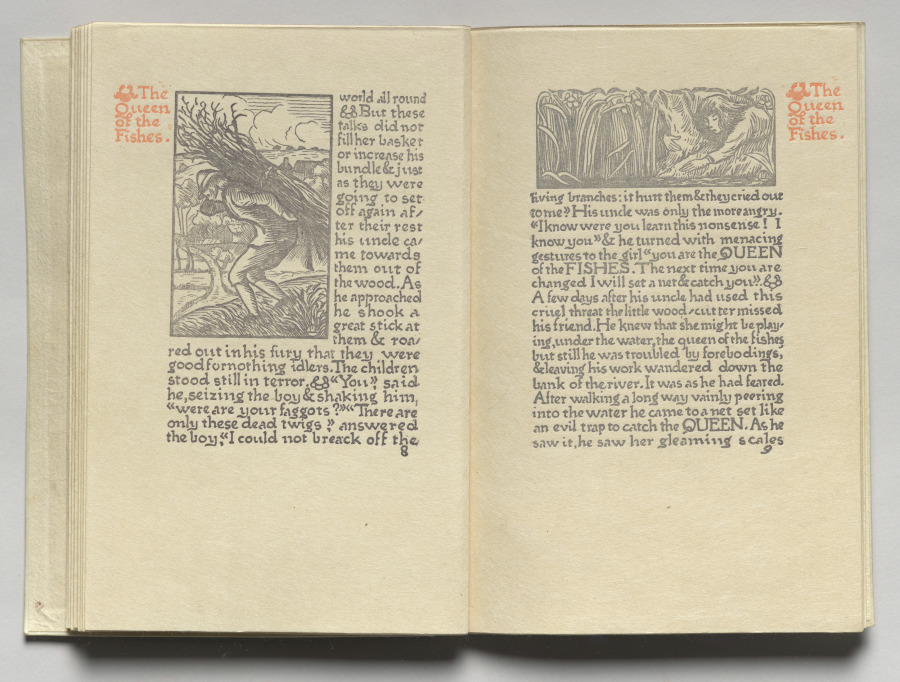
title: The Queen of the Fishes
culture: England, 19th century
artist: Lucien Pissarro (British, 1863–1944)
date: 1894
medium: Bound volume with color wood-engraved illustrations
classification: Bound Volume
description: “The Queen of the Fishes” is a French fairy tale about two mistreated children who turn into a fish and an oak tree. This edition was the first book published by the Eragny Press, the private firm of Lucien Pissarro, son of impressionist painter Camille Pissarro. Following the example of William Morris, Lucien wanted to return to the careful design and high-quality materials of early printed books. He and his wife, Esther Bensusan Pissarro, made this publication almost entirely by hand, including designing and engraving all the illustrations and ornaments.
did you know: Lucian Pissarro was a son of Impressionist painter Camille Pissarro.